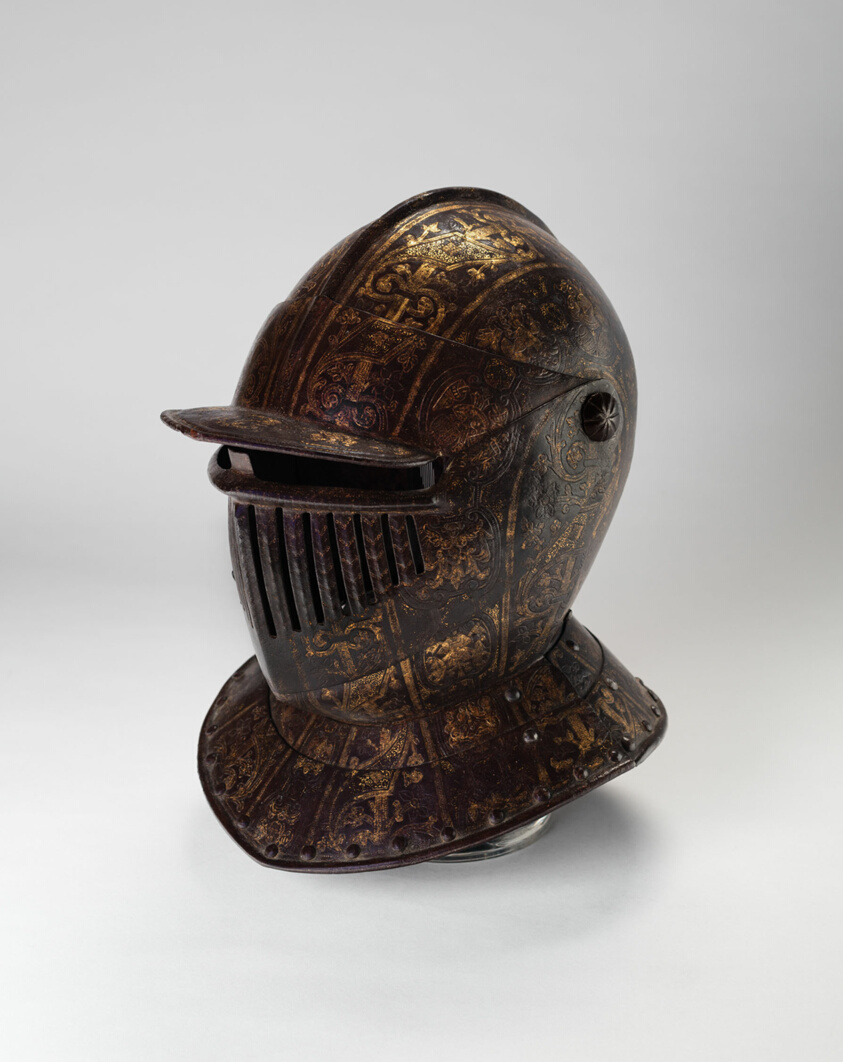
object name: Armor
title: Closed Burgonet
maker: Italian, Milan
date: 1600/10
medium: steel, gold, silver, and brass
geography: Milan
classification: suit-helmet; armor; arms and armor